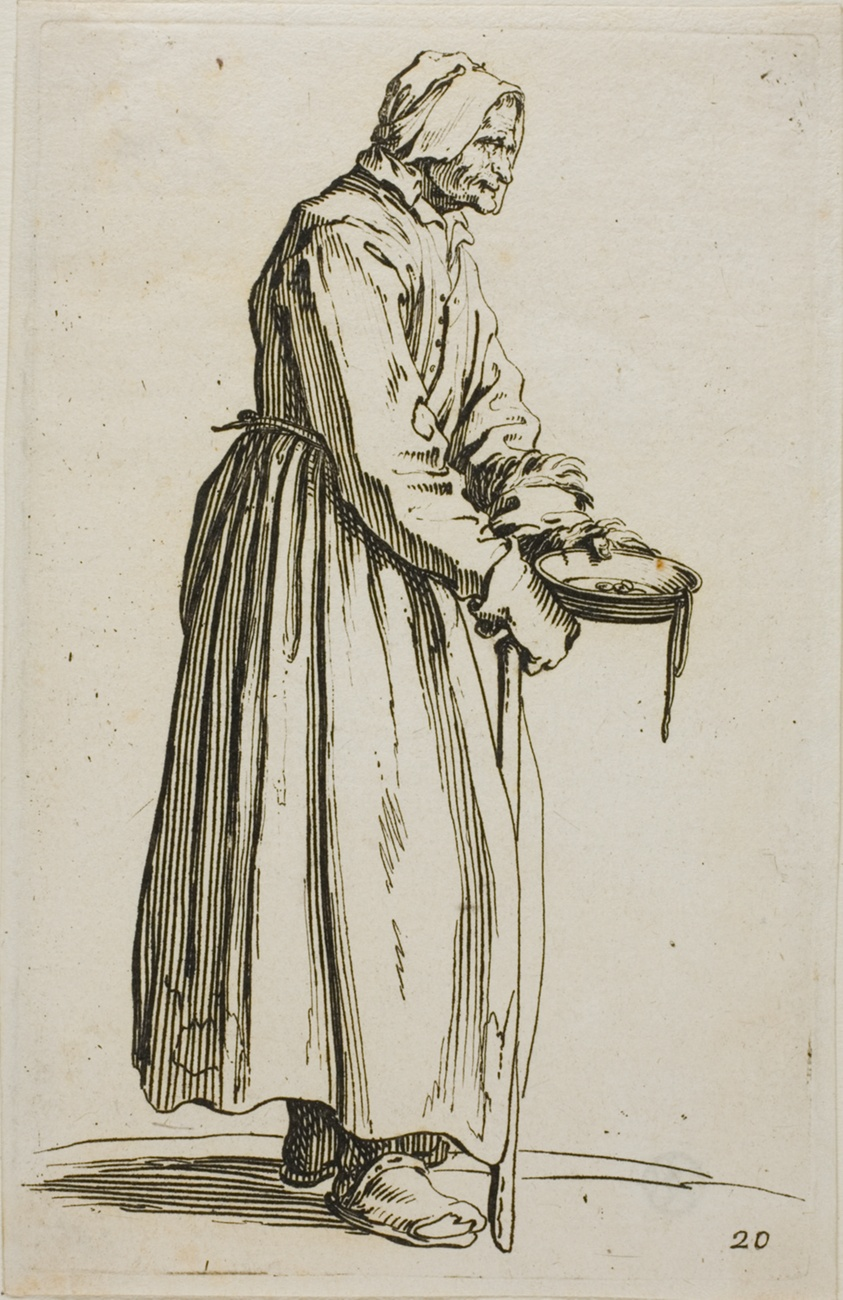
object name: Print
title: Woman Beggar Holding Alms, plate 20 from The Beggars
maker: Jacques Callot (French, 1592-1635)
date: c. 1622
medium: Etching on paper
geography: France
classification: etching; print; prints and drawing